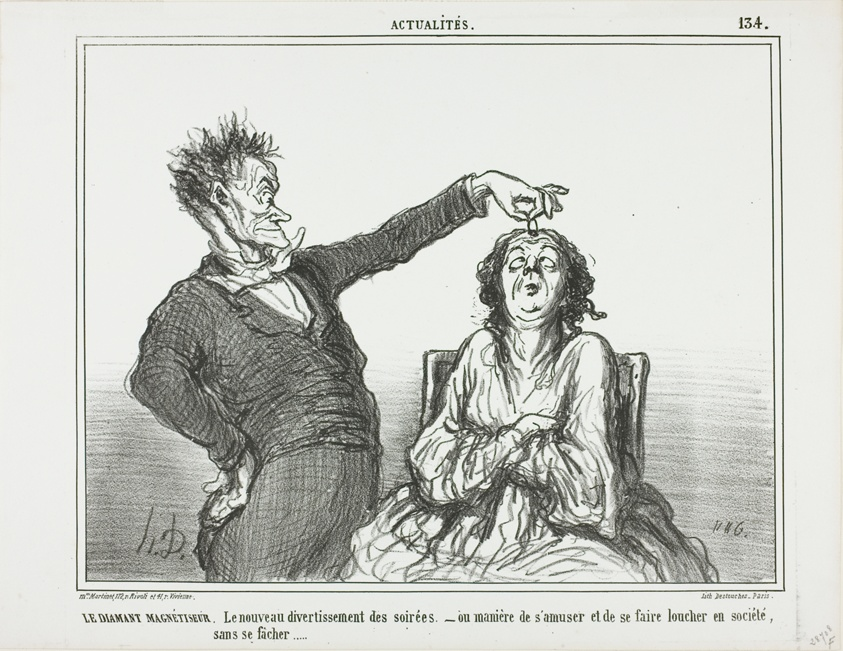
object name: Print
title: The Diamond Hypnotist. A new pastime at evening parties - or how to have fun and get someone to squint, without getting into trouble, plate 134 from Actualités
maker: Honoré Victorin Daumier; French, 1808-1879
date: 1859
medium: Lithograph in black on white wove paper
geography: France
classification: lithograph; print; prints and drawing